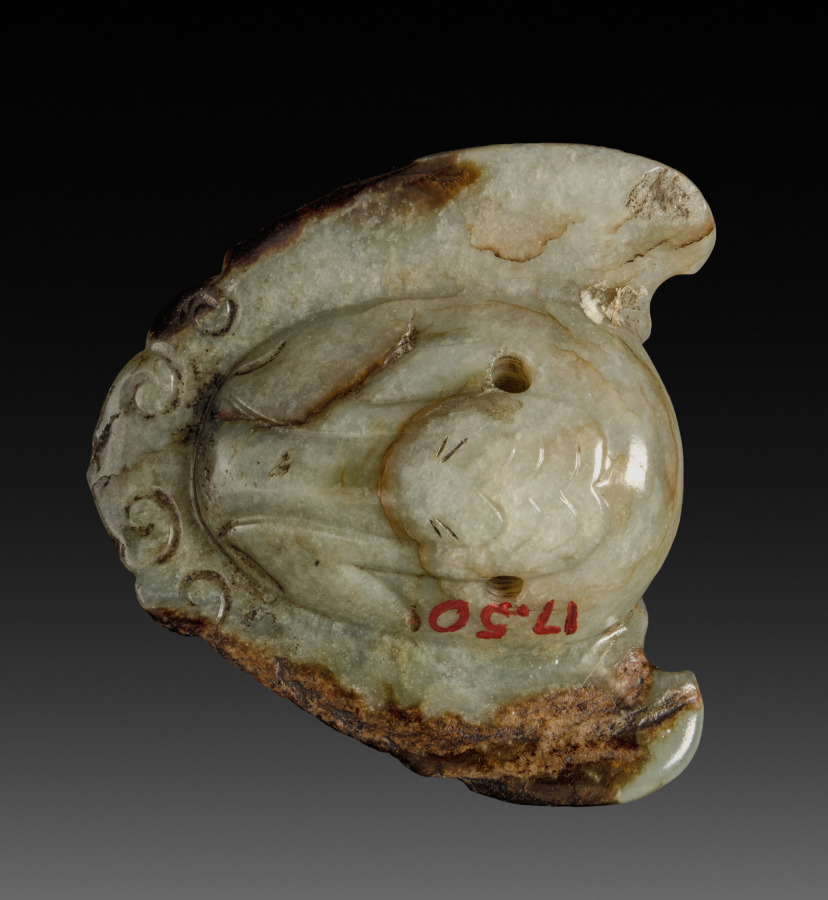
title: Pendant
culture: China, Song dynasty (960-1279) or later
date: 960–1279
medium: jade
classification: Jade